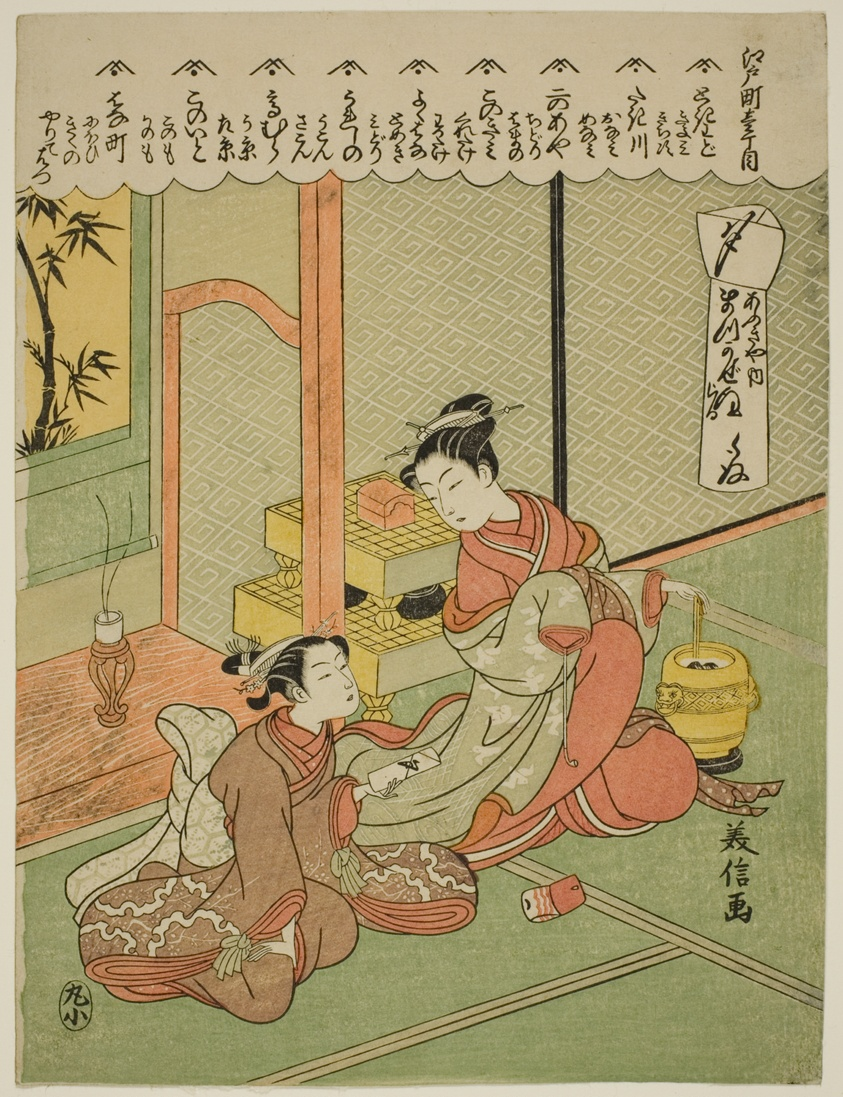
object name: Print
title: The Courtesan Matsukaze of Ogiya in Edo-machi Itchome (Edo-machi Itchome, Ogiya uchi Matsukaze)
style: Japanese (culture or style)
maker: Komai Yoshinobu (Japanese, active c. 1764-81)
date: c. 1765/71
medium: Color woodblock print; chuban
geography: Japan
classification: woodblock print; print; asian art